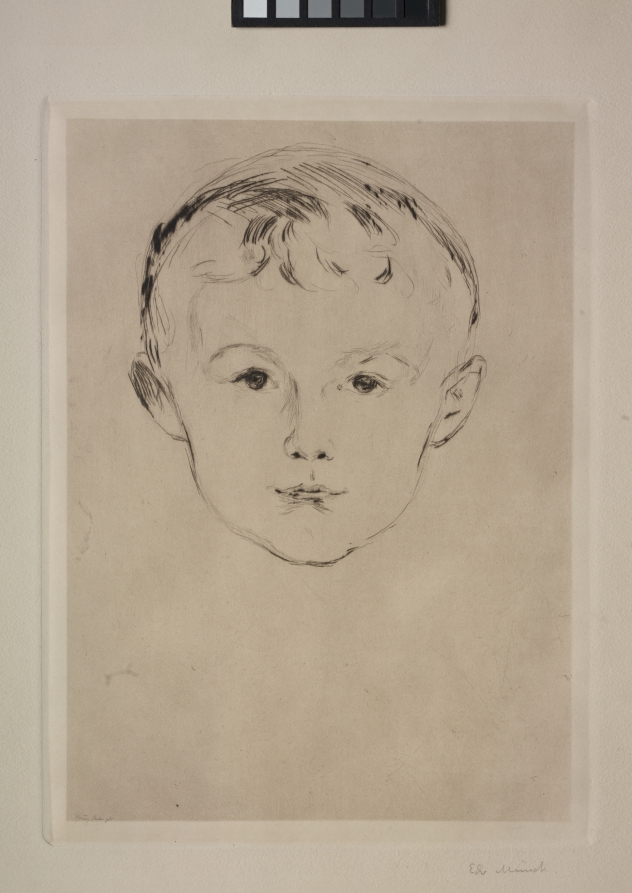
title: From Max Linde's House: Theodor Linde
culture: Norway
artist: Edvard Munch (Norwegian, 1863–1944)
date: 1902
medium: drypoint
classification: Print